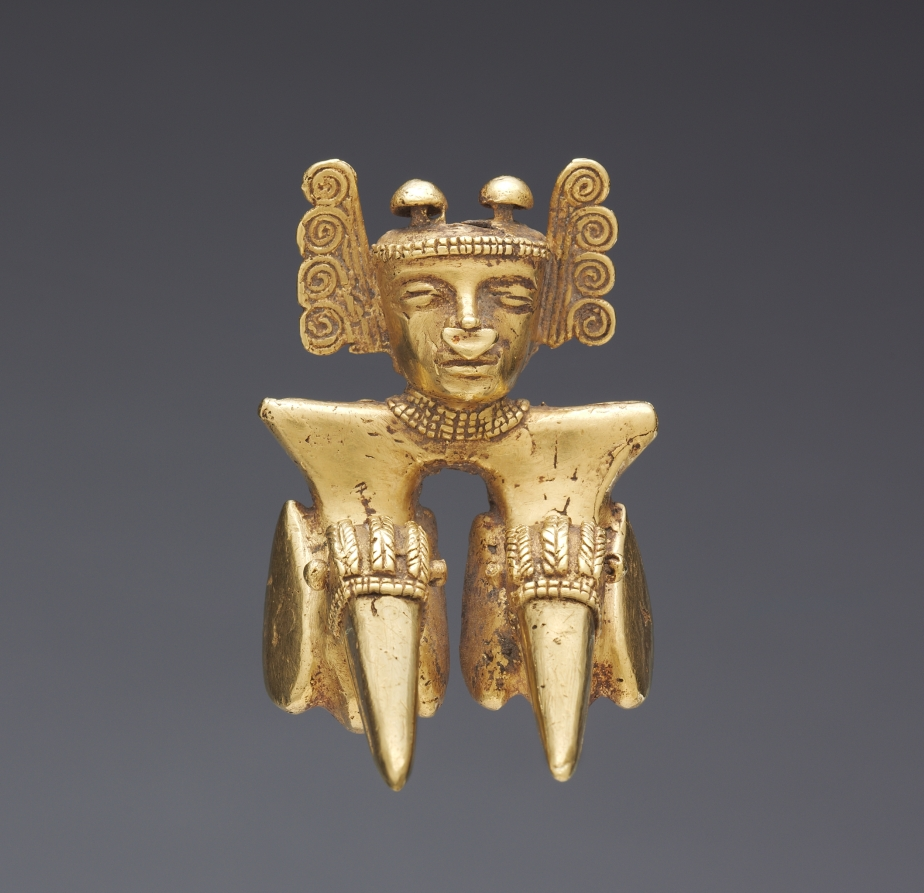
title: Pendant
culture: Panama, International Style, 5th-8th century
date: 400–700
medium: cast gold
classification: Metalwork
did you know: In the Panama-Costa Rica region, gold ornaments were associated with political and religious authority.